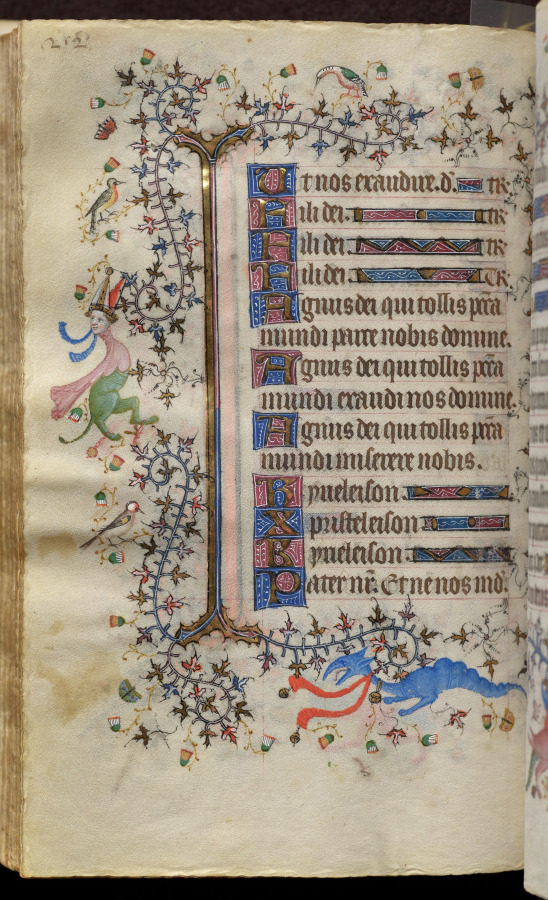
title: Hours of Charles the Noble, King of Navarre (1361-1425): fol. 126v, Text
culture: France, Paris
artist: Master of the Brussels Initials and Associates (French)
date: c. 1405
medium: ink, tempera, and gold on vellum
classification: Bound Volume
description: This precious volume was obviously highly prized by its owner, the French-born King of Navarre, who had his coat of arms painted on no less than twenty folios. Rather than directly commissioning this manuscript from a specific workshop, it seems that Charles the Noble acquired his book of hours -- perhaps ready-made for the luxury market -- while on a trip to Paris in 1404-05. A collaborative effort, six painting styles are evidenced within the pages of this codex, those of two Italians, two Frenchmen, and two Netherlanders. The painter who was responsible for the planning and decoration of the book, and who produced seventeen of the large miniatures, was a Bolognese artist known as the Master of the Brussels Initials. His principal assistant, responsible for most of the borders, was a Florentine who signed his name "Zecho" da Firenze on folio 208 verso.